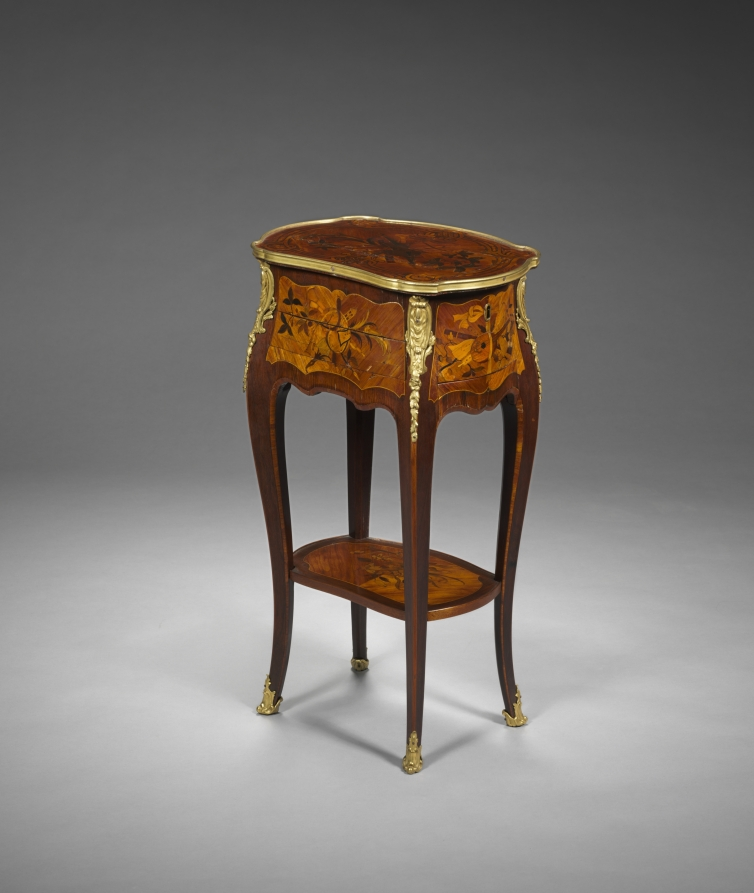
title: Work Table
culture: France, Paris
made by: Bernard Peridiez (French, d. 1757)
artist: or Gerard Peridiez (French, born c.1730)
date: 1700–1799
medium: wood marquetry with gilt bronze mounts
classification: Furniture and woodwork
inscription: signed under shelf: B. Peridiez JNE.